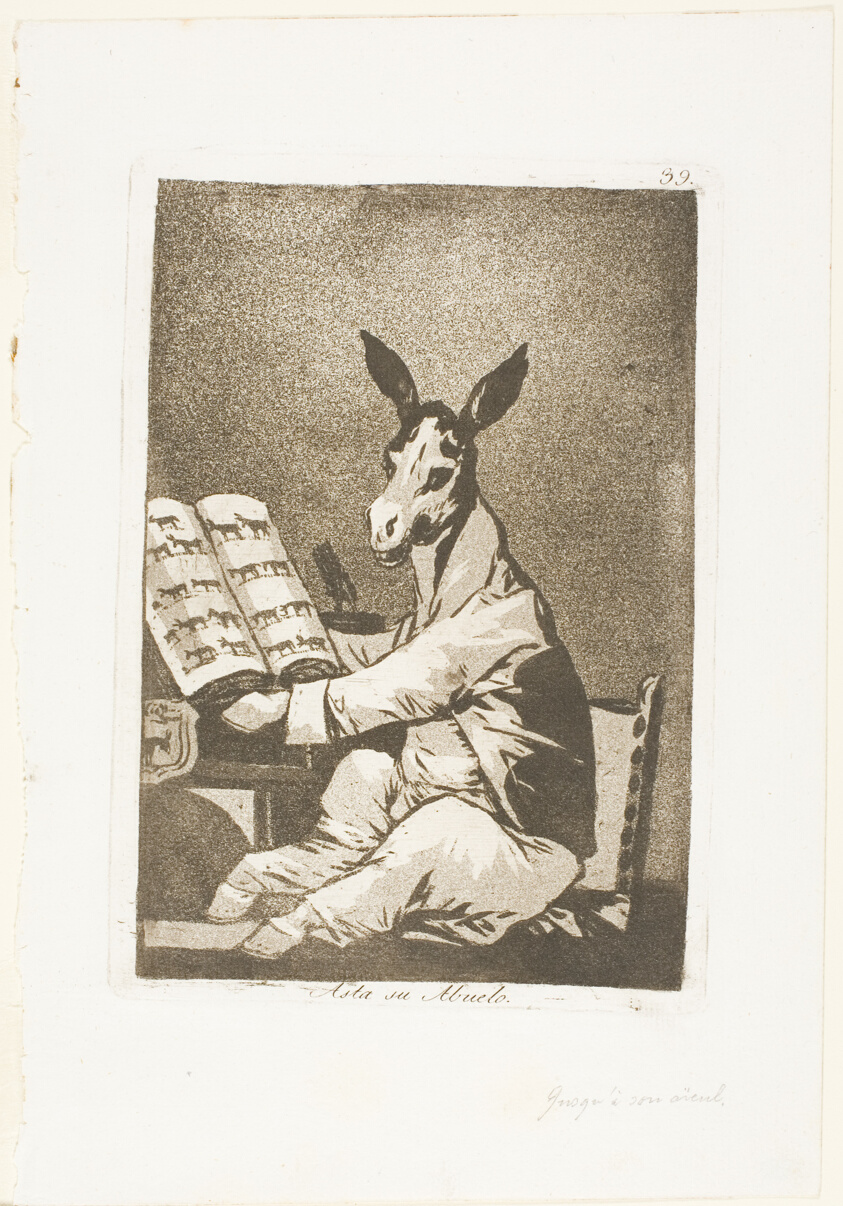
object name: Print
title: And So Was His Grandfather, plate 39 from Los Caprichos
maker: Francisco José de Goya y Lucientes (Spanish, 1746-1828)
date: 1797/99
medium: Aquatint on ivory laid paper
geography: Spain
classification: etching; print; prints and drawing